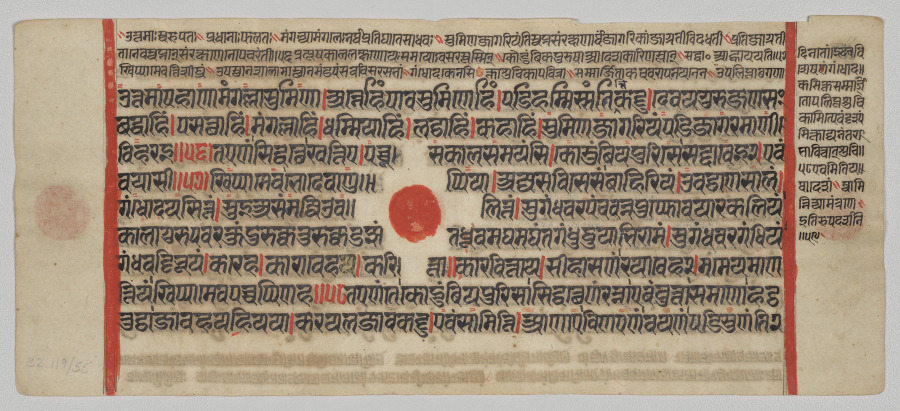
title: Text, Folio 21 (recto), from a Kalpa-sutra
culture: Western India, Gujarat, last quarter of the 15th century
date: c. 1475–1500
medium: Gum tempera, ink, and gold on paper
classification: Painting